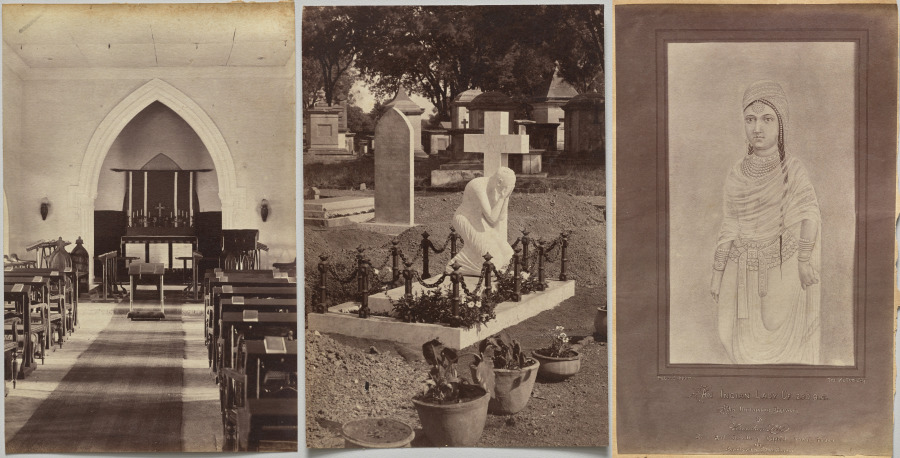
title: Interior of Church, Neemuch (recto, right); Grave of Dr. Falwasser, Neemuch (recto, left); Indian Lady 250 BC (verso, right)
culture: India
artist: Raja Deen Dayal (Indian, 1844–1905)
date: c. 1882–87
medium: albumen print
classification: Photograph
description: These photographs are part of an album, now disassembled, of around 105 photographs taken in India between 1885 and summer 1887 that provide glimpses into the lives of the British colonial elite and royal and upper-class Indians. The museum holds another group of 37 pictures from this album (2016.266), which was probably commissioned by a British civil servant visiting or working in India around 1888 as a personal souvenir of his experiences there.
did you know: Raja Deen Dayal is regarded now, and was considered during his lifetime, to be India’s most important 19th-century photographer.